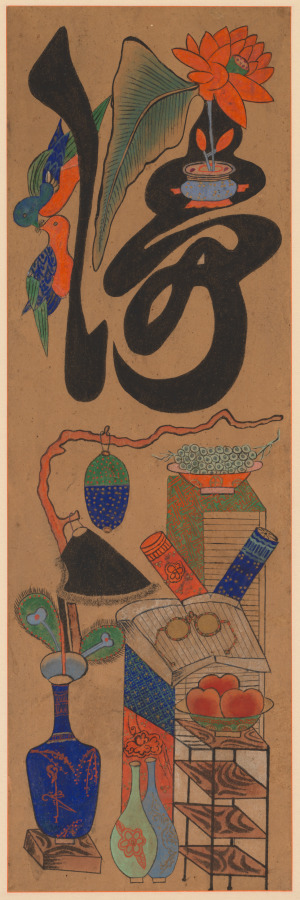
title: Munja-Chaekgeori Screen (Character-Books Screen)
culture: Korea, Joseon dynasty (1392–1910)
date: early 1900s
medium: Eight-panel folding screen, ink on paper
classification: Painting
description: This folding screen is a whimsical harmony of two different subjects: chaekgeori, or books and things; and munja, or characters. The lower section of each panel depicts the imagery of things, including books, decorative arts, and utilitarian objects. The upper portion of each panel bears a classical Chinese character. Read from far right to left, the eight characters refer to the values of Confucian teachings of the Joseon dynasty: filial piety, brotherly love, loyalty, trust, propriety, righteousness, modesty, and humility. While these two pictorial genres are harmoniously conjoined on the same picture plane, two sharply contrasting world views—urban consumerism and traditional Confucian ethics that despise materialism—compete with one another.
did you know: The eight Korean characters each mean filial piety, brotherly love, loyalty, trust, propriety, righteousness or justice, modesty or integrity, and humility or the feeling of shame.